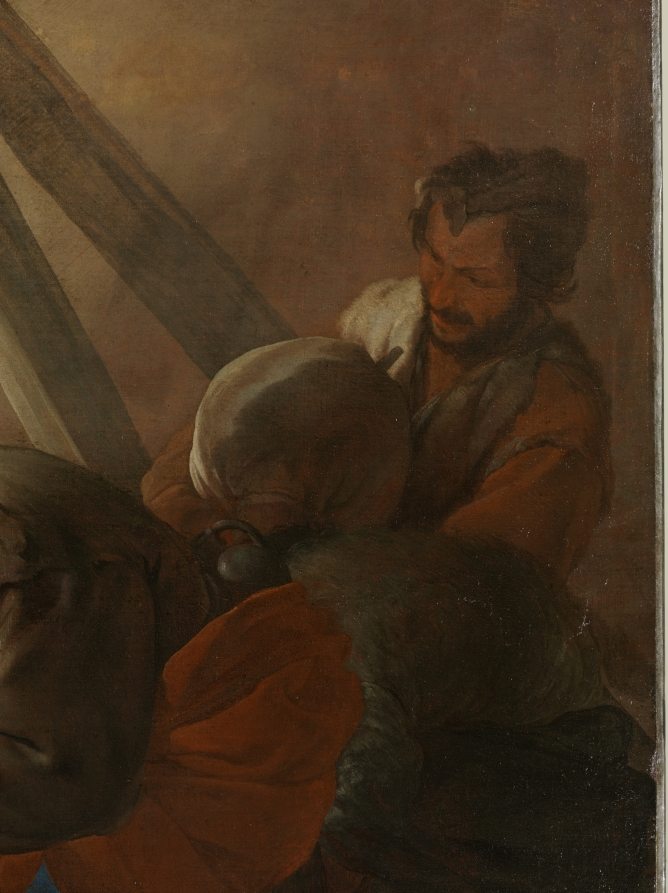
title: Adoration of the Shepherds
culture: Italy, 17th century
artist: Bernardo Cavallino (Italian, 1616–1656)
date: c. 1650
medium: oil on canvas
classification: Painting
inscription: Signed left on ox: "BC [monogram]"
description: Cavallino worked in Naples where he was not well known during his lifetime, but was alert to the work of contemporaries whose innovations he transformed with extraordinary delicacy and charm. The adoration of the shepherds is a traditional subject, but here Cavallino shows it in a new light. The focus is on Mary, indicating that she alone is aware of the angels who flutter above with ribbons proclaiming Gloria in Excelsis Deo (Glory to God in the highest). Joseph and the shepherds stolidly regard the child, but the sweetness of Mary's expression simultaneously reveals her love, pride, and humility.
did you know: The artist signed this painting with his monogram “BC” on the rump of the ox.